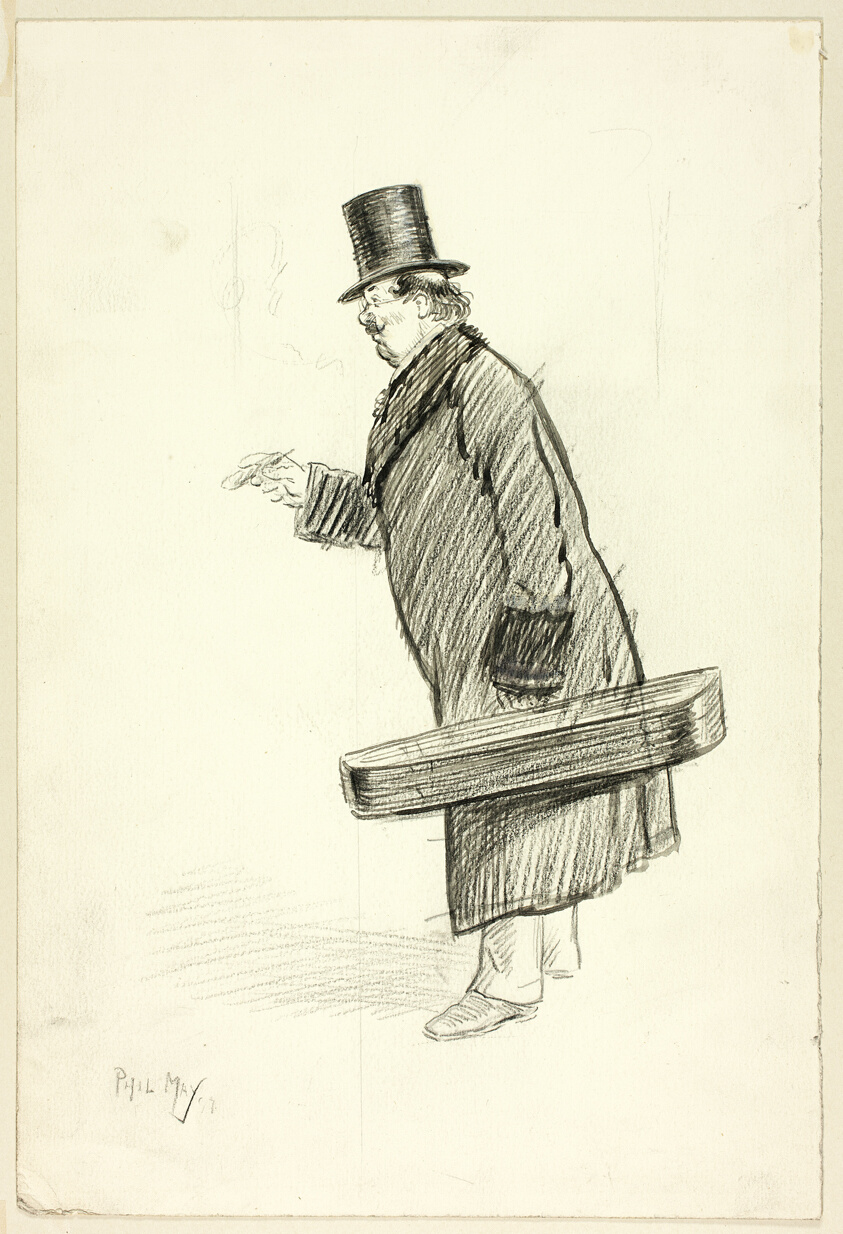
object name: Drawing and Watercolor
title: Man with Violin Case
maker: Philipp William May; English, 1864-1903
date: 1897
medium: Pen and black ink over black chalk and touches of graphite, heightened with white gouache, on ivory wove paper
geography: England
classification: crayon; drawings (visual works); prints and drawing